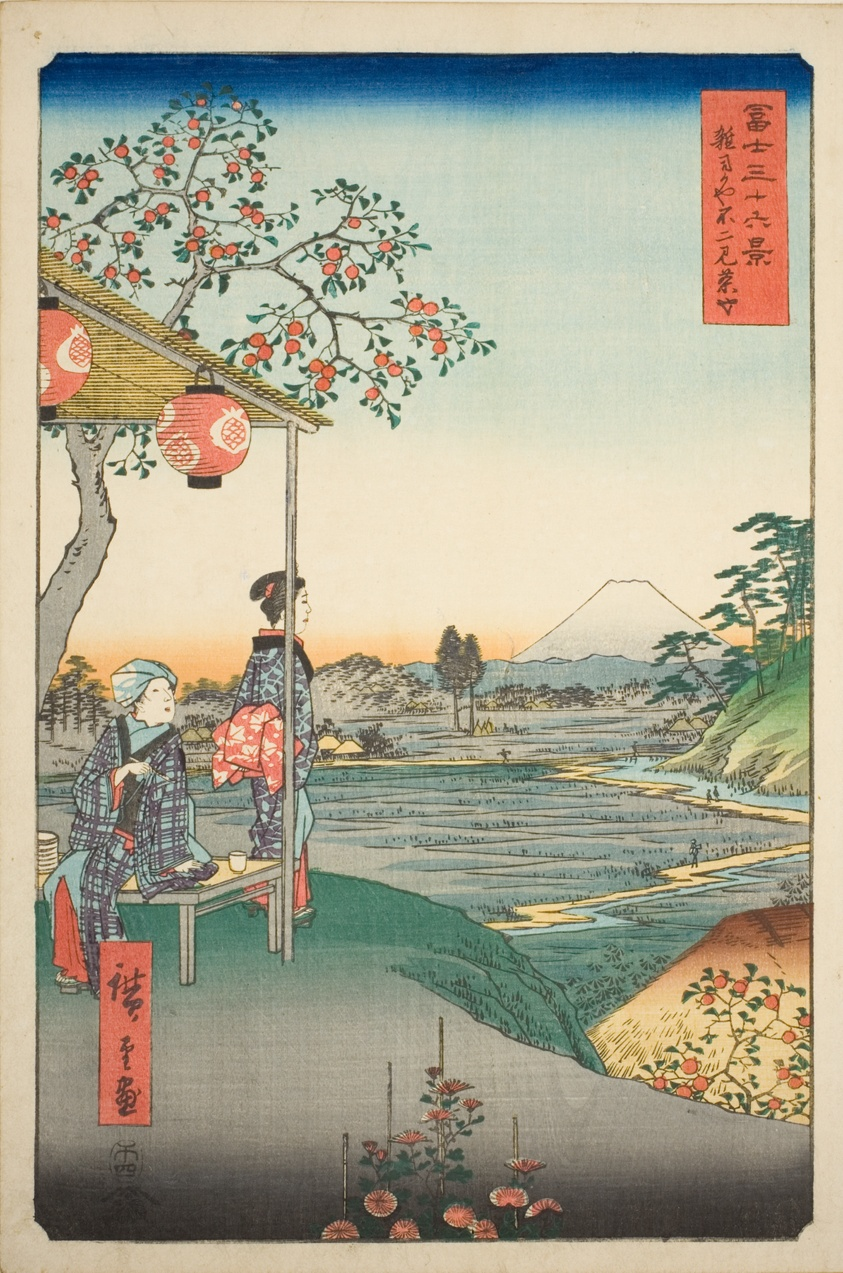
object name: Print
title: View of Mount Fuji from a Teahouse at Zoshigaya (Zoshigaya Fujimi chaya), from the series "Thirty-six Views of Mount Fuji (Fuji sanjurokkei)"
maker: Utagawa Hiroshige 歌川 広重; Japanese, 1797-1858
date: 1858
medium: Color woodblock print; oban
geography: Japan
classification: woodblock print; print; asian art